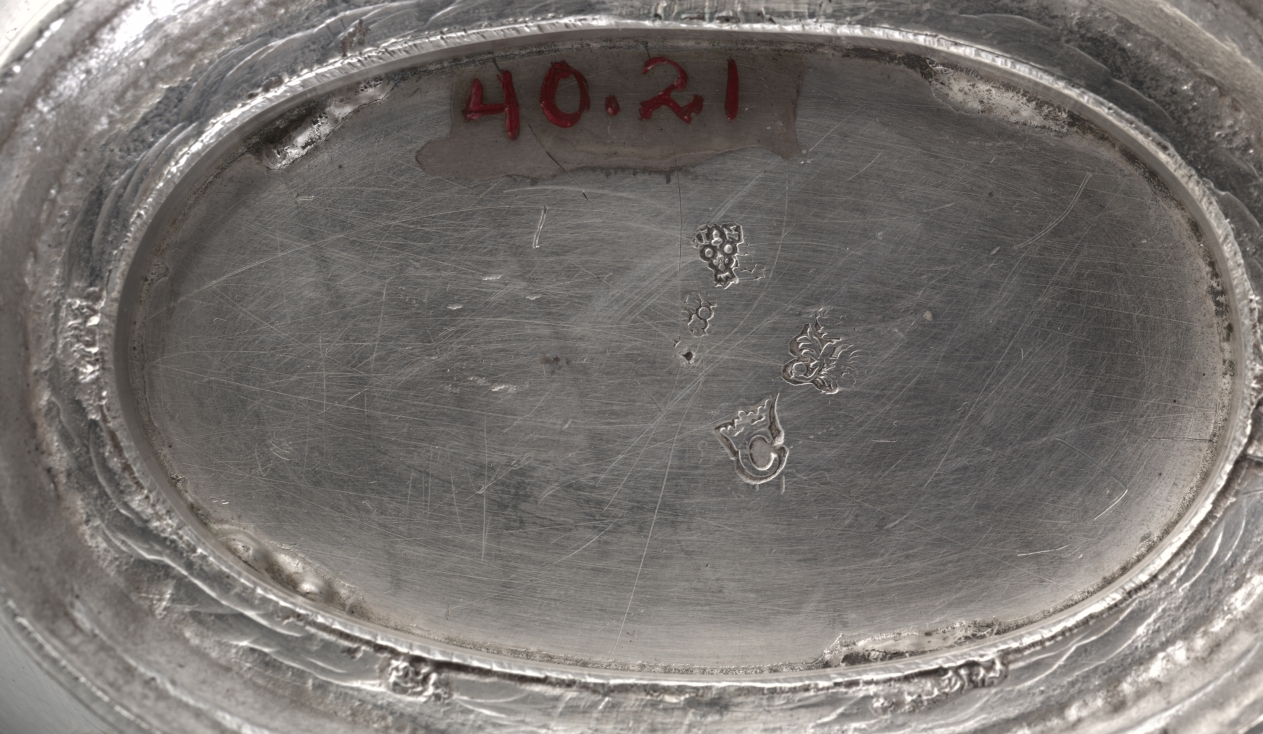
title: Sauce Boat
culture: France, Paris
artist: Nicolas Duclos (1699–1755), master silversmith in 1726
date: 1743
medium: silver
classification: Silver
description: When heated sauces began to be served separately from meat and fish towards the end of the 17th century, sauce boats began to be used as another piece of elaborately designed silver dinner services popular in European courts. This sauce boat reflects early models in the shape of a nef, a condiment vessel which derives its name from a ship of the same shape.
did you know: This sauceboat would likely have been accompanied by a tray and a spoon used to skim grease from the surface of the sauce.